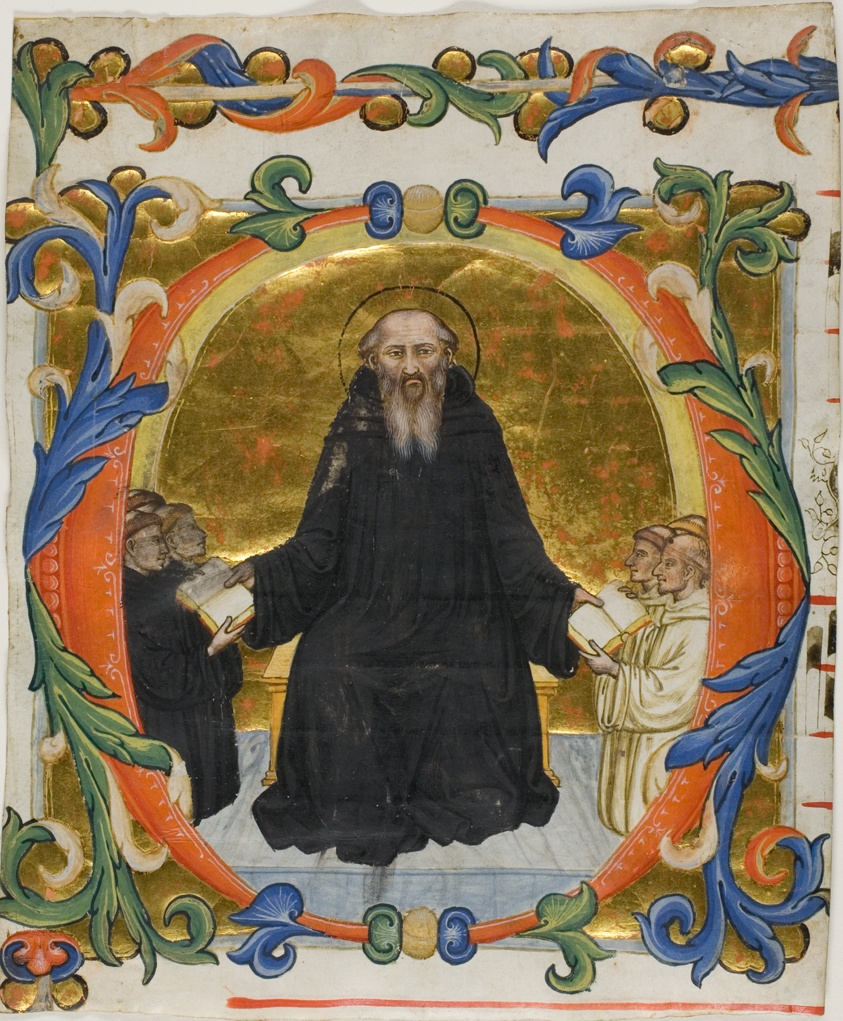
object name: Drawing and Watercolor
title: Saint Benedict Presenting his Rule to Benedictine and Cistercian Monks in a Historiated Initial "O" from a Choirbook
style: medieval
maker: Italian (Siena); Martino di Bartolomeo (Italian, 1389-1434/5); 1394/95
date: 1394/95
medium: Manuscript cutting with tempera and gold leaf, with rounded gothica textualis inscriptions in black ink, ruled in red, on parchment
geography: Italy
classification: tempera; manuscript; drawings (visual works); prints and drawing